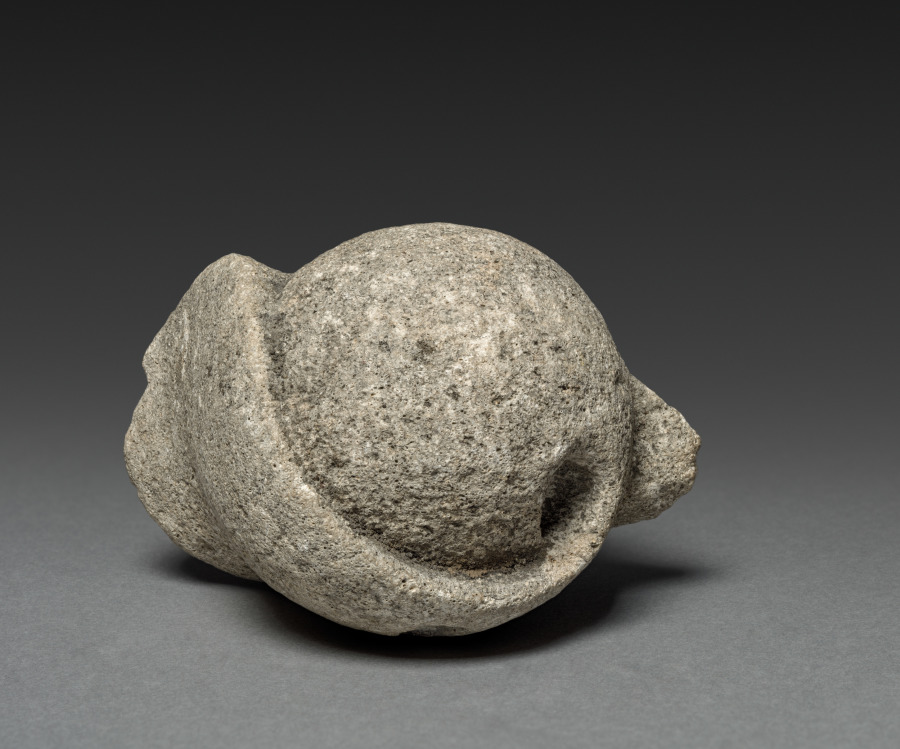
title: Spherical Fragment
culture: France(?)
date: 1200s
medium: limestone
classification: Sculpture